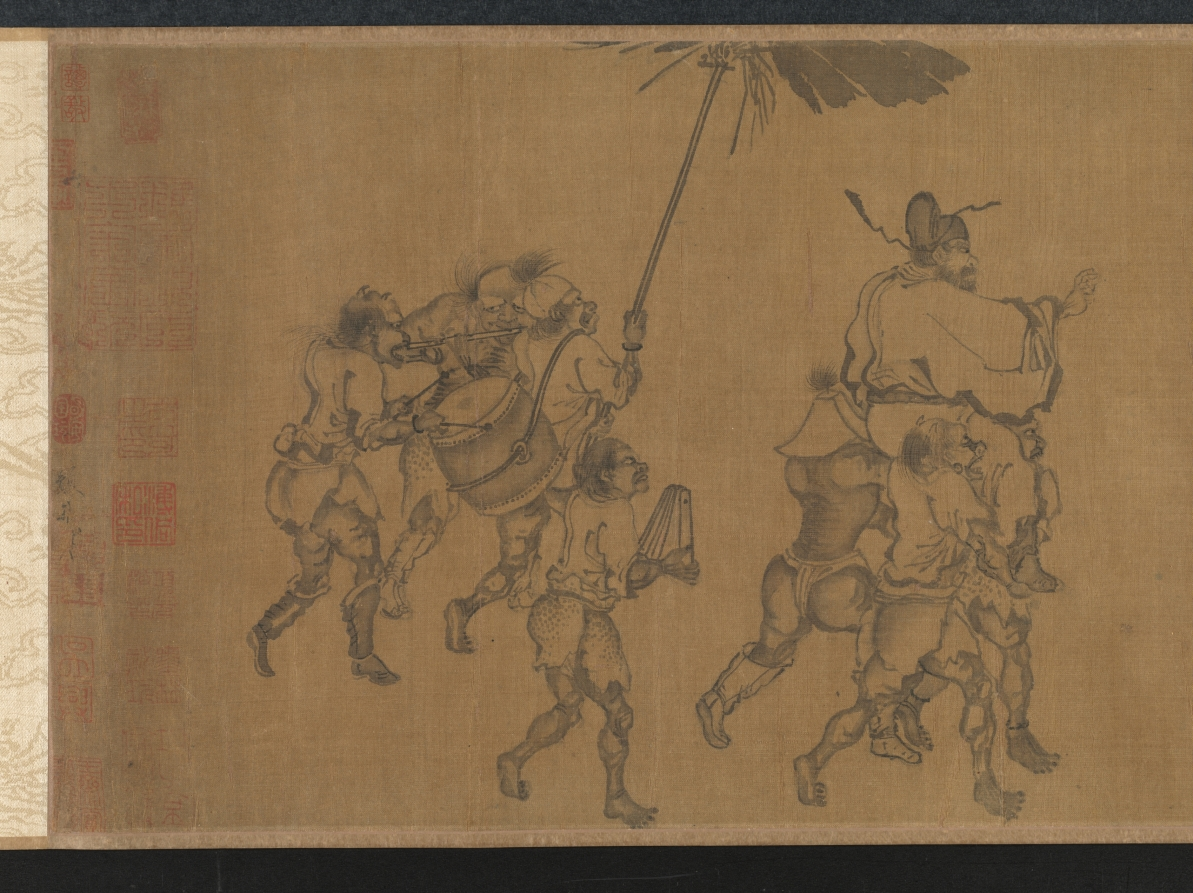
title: The Lantern Night Excursion of Zhong Kui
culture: China, Yuan dynasty (1271-1368)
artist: Yan Hui (Chinese, active 1270–1310)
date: late 1200s–early 1300s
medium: handscroll; ink and slight color on silk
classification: Painting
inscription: Artist's signature [and probable seal]: Yan Qiuyue 顏秋月 Title on frontispiece and 1 seal of Niu Shuyu 鈕樹玉 (1760–1827): Qiuyue mohuan 秋月墨幻 [Qiuyue's Ink Fantasy]. 31 additional seals: 2 of Yang Shiqi 楊士奇 (1365–1444); 2 of An Guo 安國 (1481–1534); 8 of Xiang Yuanbian 項元汴 (1525–1590); 2 of Geng Zhaozhong 耿昭忠 (1640–1686); 4 of Pu Tung 溥侗 (1870–1952); 7 of Tan Jing 譚敬 (1911–1991); 1 of Liu Ting-chih (20th c.); 5 unidentified.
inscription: An inscription by Zizhi Shanren 紫芝山人 [probably Jiang Hui 蔣惠], dated 1389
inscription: An inscription by Wu Kuan 吳寬 (1436–1504)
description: Here, the demon queller Zhong Kui leads a nightly procession of street entertainers with bare, muscular bodies and demonic faces. Some wear shabby clothes, and all perform stunts and tricks to astound and scare the viewer. In fact, a New Year custom in cities of southeast China had the poor, disguised as demons, process through the streets and play their tricks to clear households of evil spirits and welcome the spring. From right to left, a demonic figure leads the procession and beats a drum; another lifts a large rock; one stands on his hands trying to drink; one balances a jar on his elbow; three hold and wield weapons; one carries a folded chair covered by a cow’s skin; another holds Zhong Kui’s qin (zither), books, brush, and inkstone. At the end of the scroll, two figures offer a cup and bottle of wine to Zhong Kui, who lifts his hand in command.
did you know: Zhong Kui was an ancient ghostbuster.